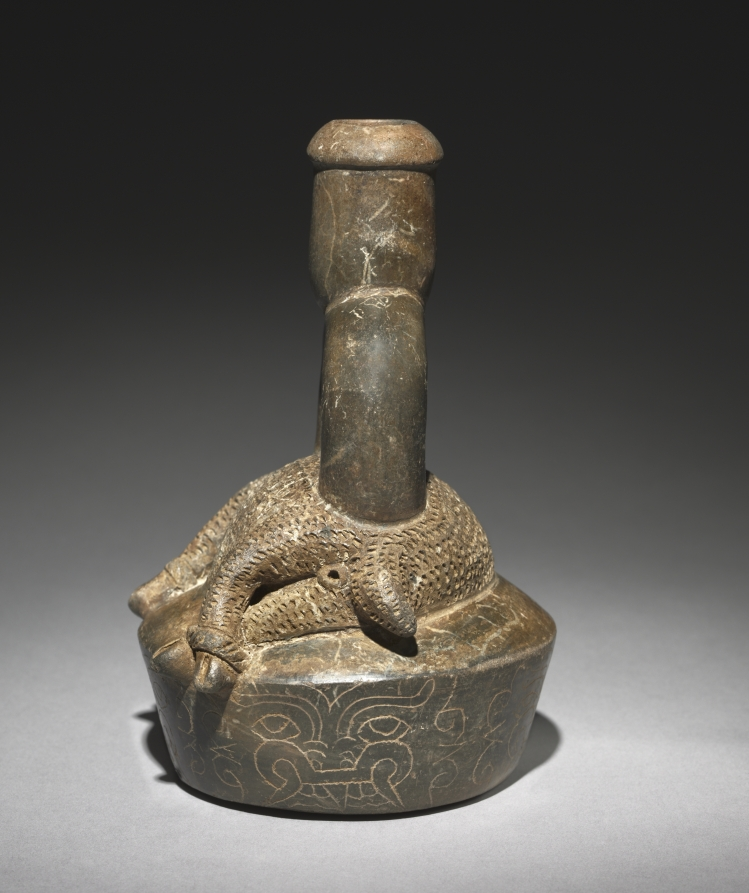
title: Vessel with Pudu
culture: Central Andes, North Coast, Chongoyape, Formative period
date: 500–200 BCE (thermoluminescence date, 1190–90 BCE)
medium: ceramic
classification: Ceramic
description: This bound pudu—a small reddish deer indigenous to the Andes—lies atop a chamber with fanged supernatural heads incised on the sides. The animal may represent a sacrificial offering.